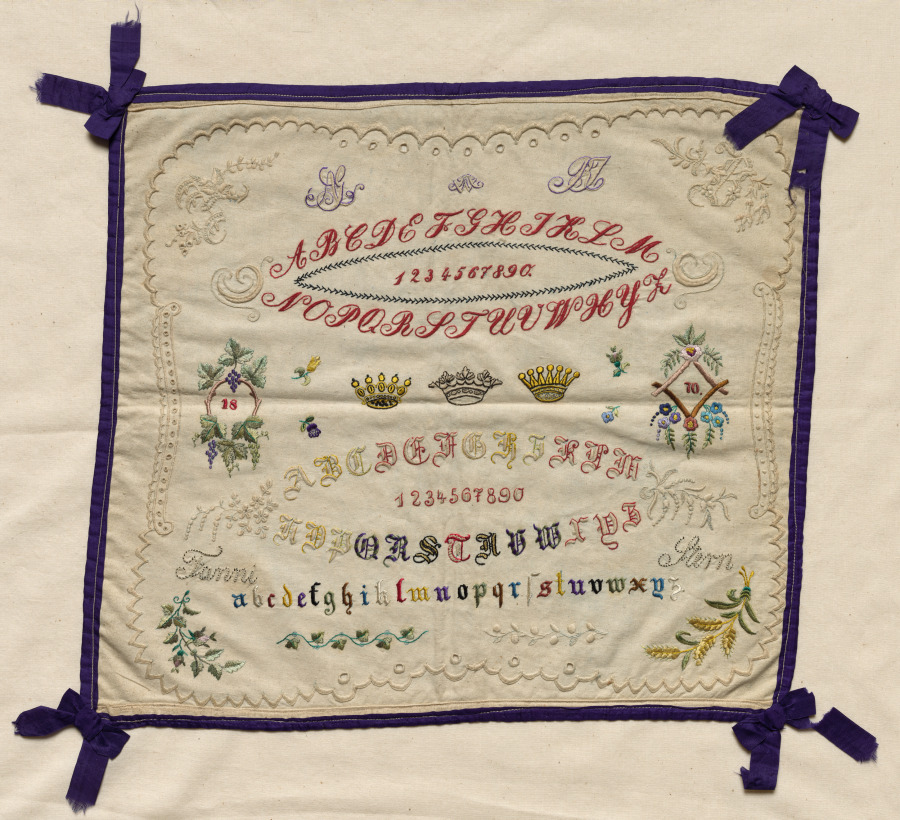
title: Sampler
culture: Germany, late 19th century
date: 1870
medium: embroidery; silk and cotton on cotton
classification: Sampler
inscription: two monograms above; center, two sets of alphabets and numerals and "18 70"; below, "Fanni Stern" and alphabet.